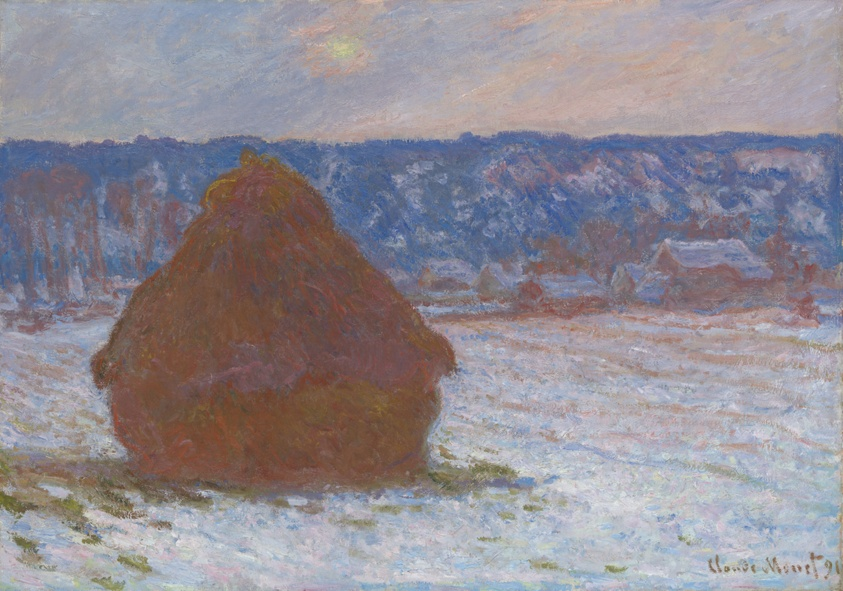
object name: Painting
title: Stack of Wheat (Snow Effect, Overcast Day)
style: Impressionism, nineteenth century, 19th century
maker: Claude Monet (French, 1840–1926)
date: 1890–91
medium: Oil on canvas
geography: France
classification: oil on canvas; paint; oil paintings (visual works); french; painting; european painting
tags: seasons, wheat, nature, landscape, field, snow, hills, building, buildings, blue, blue (color), weather/seasons, landscapes, Century of Progress, world's fairs, Chicago World's Fairs